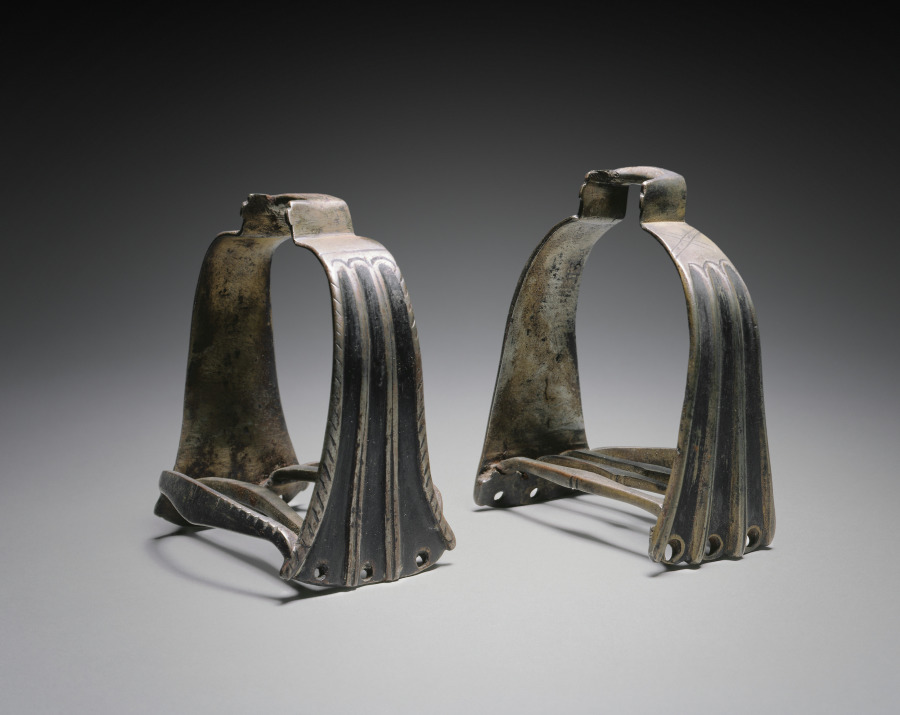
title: Stirrup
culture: Germany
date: c. 1525–1550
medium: steel with modern black paint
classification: Arms and Armor